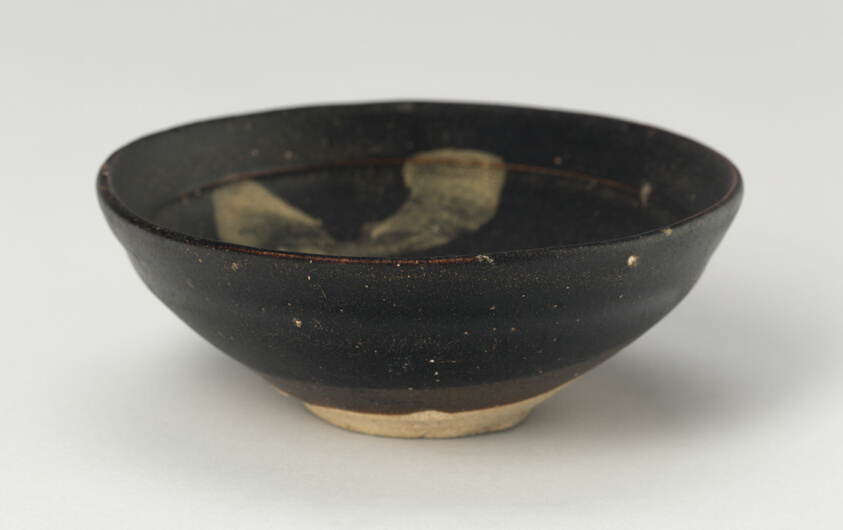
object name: Vessel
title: Bowl with Zigzag Strokes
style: Chinese (culture or style)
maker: China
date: Southern Song (1127–1279) or Yuan dynasty (1271–1368), 12th/14th century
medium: Jizhou ware; light grey stoneware with dark brown glaze and painting in overglaze buff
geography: China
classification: bowl; dish (vessel); ceramics; vessel